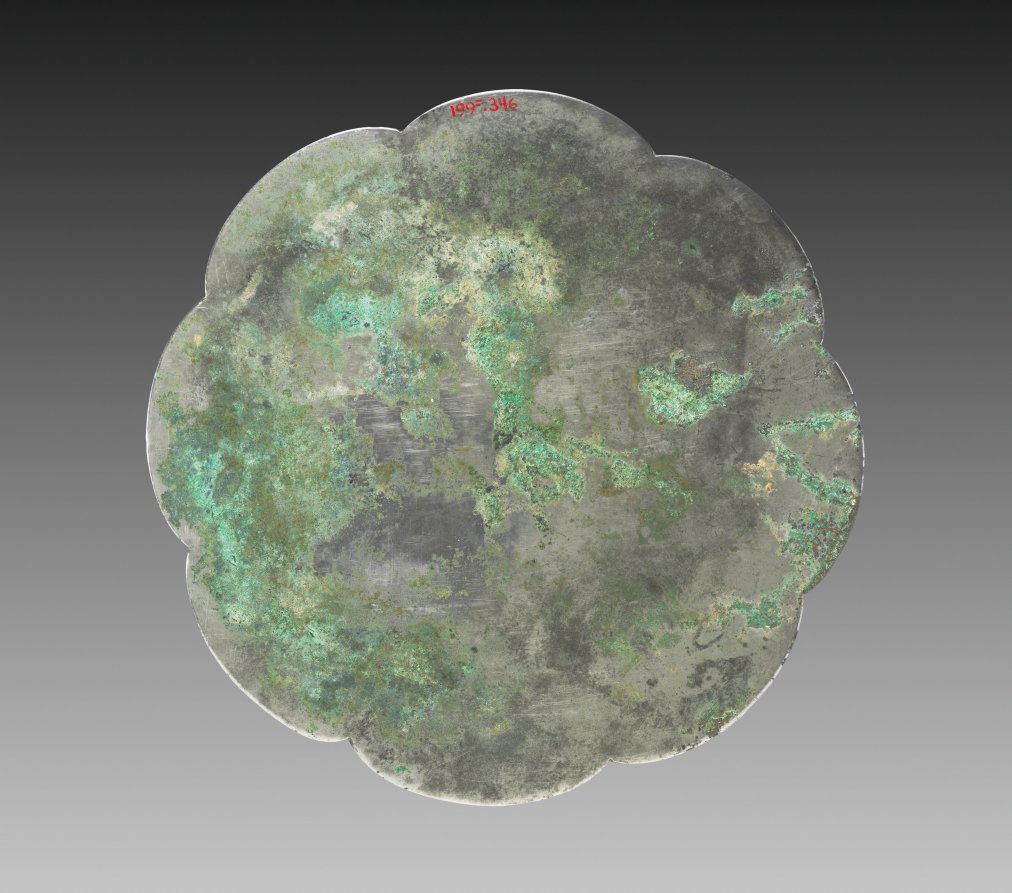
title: Lobed Mirror with Paired Phoenixes, a Nestling Bird, and a Lotus Blossom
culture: China, Tang dynasty (618-907)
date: 700s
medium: bronze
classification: Metalwork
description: Bronze mirrors typically have one polished reflective side and a decorative back with a knob to be able to lift it.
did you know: From flowers to animals, each detail on this mirror has symbolic meaning.